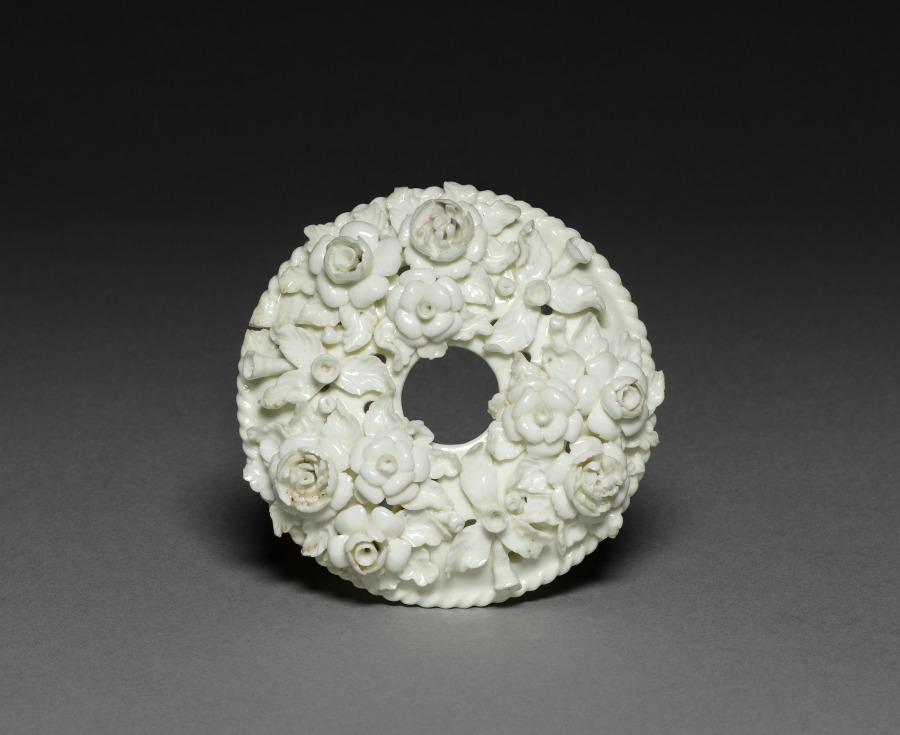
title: Cover for a Potpourri Vase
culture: France, Saint Cloud, 18th century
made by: Saint Cloud Porcelain Factory (French)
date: mid 1700s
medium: soft-paste porcelain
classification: Ceramic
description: This cover is part of a pair of covered vases that were created to contain potpourri, a mixture of flowers, herbs, and spices emitting ambient fragrance. This specific function offered a particularly fertile ground for the development of French porcelain, as manufactories experimented with forms, surface ornamentations, and placement of perforations.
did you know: Prior to Saint-Cloud's development of soft-paste porcelain in the 1690s, rumors spread throughout Europe that the prized material was made by burying a variety of materials, including lobster shells, in the ground for 80 years.